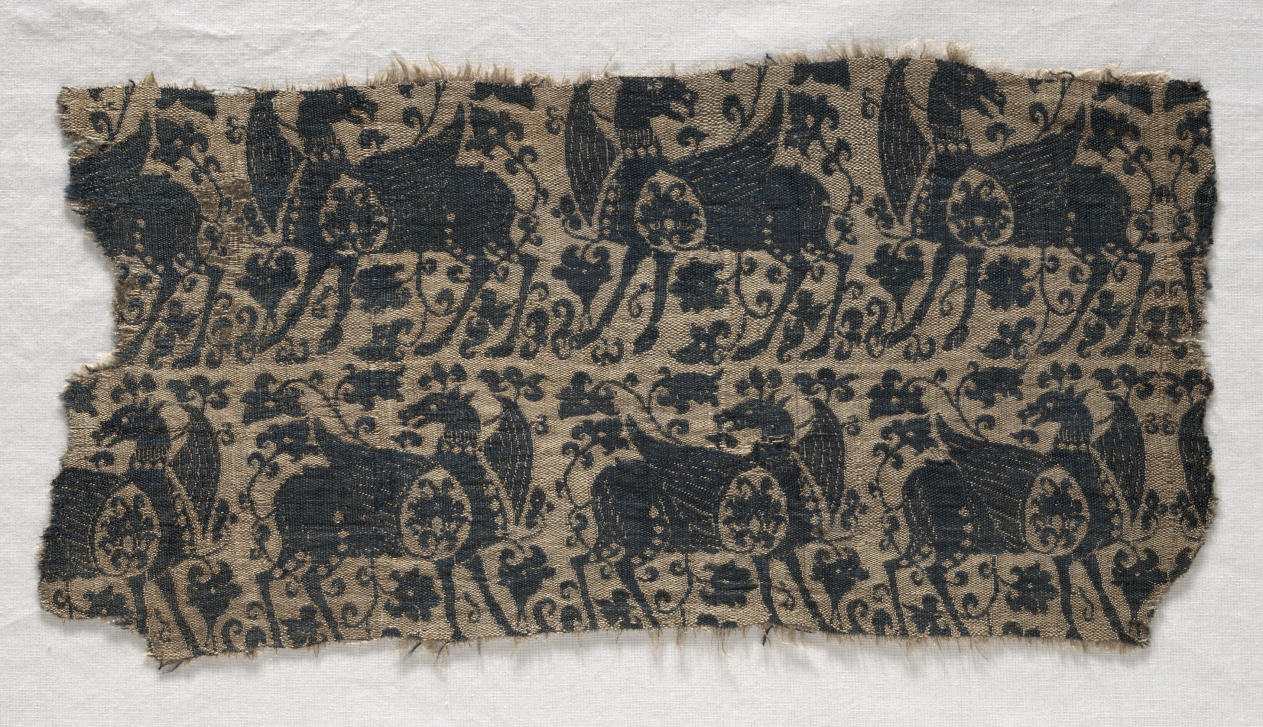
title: Fragment from Funeral Garment or Pall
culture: Iran ?, Seljuq period (1037–1194)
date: before 1966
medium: Silk: compound tabby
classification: Textile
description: The design consists of two aligned rows of winged, regardant ibexes, 3-1/2 in each row, the top row going left, the bottom row to the right. The oval ornament at the base of the wing and interstices are filled with a stylized foliate motif. The design is dark blue on a tan ground.